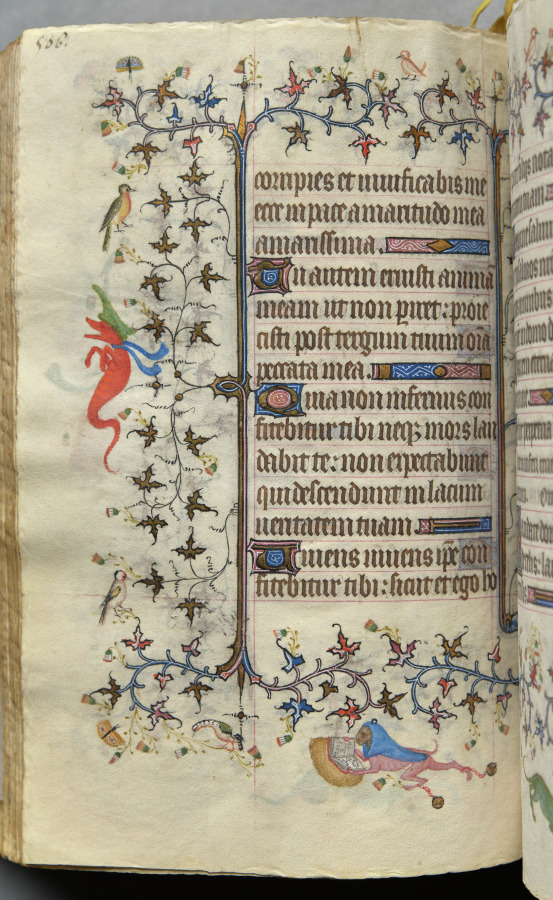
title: Hours of Charles the Noble, King of Navarre (1361-1425): fol. 247v, Text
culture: France, Paris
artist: Master of the Brussels Initials and Associates (French)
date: c. 1405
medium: ink, tempera, and gold on vellum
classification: Bound Volume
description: This precious volume was obviously highly prized by its owner, the French-born King of Navarre, who had his coat of arms painted on no less than twenty folios. Rather than directly commissioning this manuscript from a specific workshop, it seems that Charles the Noble acquired his book of hours -- perhaps ready-made for the luxury market -- while on a trip to Paris in 1404-05. A collaborative effort, six painting styles are evidenced within the pages of this codex, those of two Italians, two Frenchmen, and two Netherlanders. The painter who was responsible for the planning and decoration of the book, and who produced seventeen of the large miniatures, was a Bolognese artist known as the Master of the Brussels Initials. His principal assistant, responsible for most of the borders, was a Florentine who signed his name "Zecho" da Firenze on folio 208 verso.